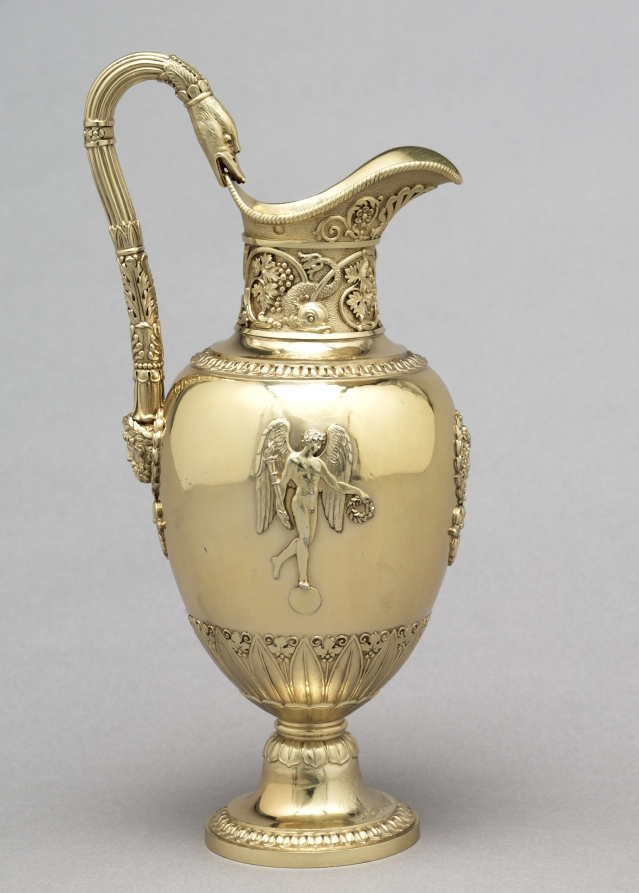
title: Ewer (aiguière)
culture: France, 19th century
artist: Jean Baptiste Claude Odiot (French)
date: c. 1817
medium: silver gilt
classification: Silver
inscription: [Excise mark for medium-sized work, Paris, 1809-1819, on edge of base]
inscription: [Two maker's marks of Jean-Baptiste-Claude Odiot after the Revolution, inside foot]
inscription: [Official assay mark for first standard silver, Paris, 1809-1819, near exterior upper rim]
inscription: [Applied coat of arms of the count Alfred de la Chapelle, Seigneur of Morton and Beaulieu, Périgord “accolé” with an alternate version of de la Chapelle, exterior of foot]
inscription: [Struck twice, interior foot]: "ODIOT"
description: Jean-Baptiste-Claude Odiot’s reputation stretched internationally. Commissioned by Russian count Nikolei Demidoff, this ewer was one part of an extensive silver dinner service. Decorated with motifs of classical antiquity, this object’s Greco-Roman silhouette, grape vine frieze, raised mythological figures, and sinuous swan’s neck handle were likely inspired by the designs of Charles Percier and Pierre-François Fontaine, architects of Napoleon I.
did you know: The coat of arms on the foot of this ewer belongs to the count Alfred de la Chapelle who owned this silver dinner service during the second half of the 19th century.